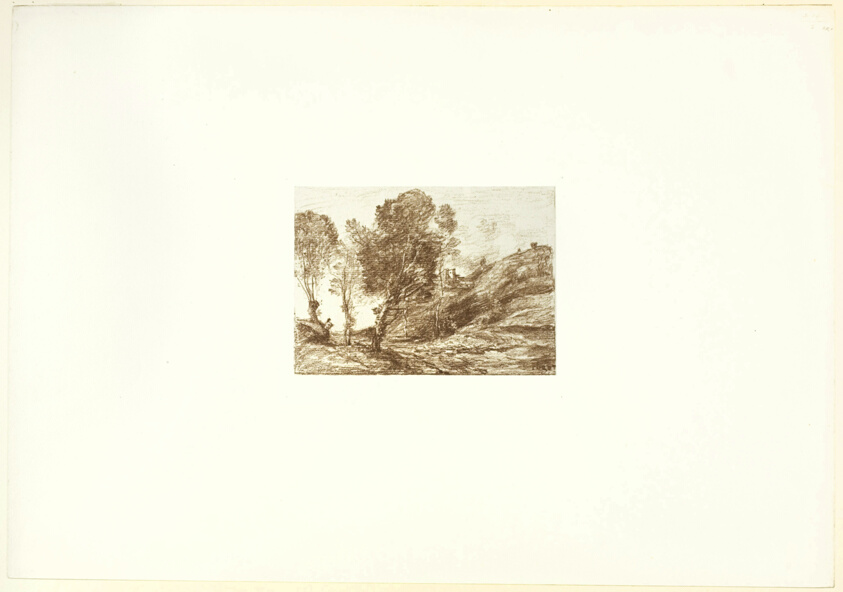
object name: Print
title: Remembrance of Italy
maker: Jean-Baptiste-Camille Corot; French, 1796-1875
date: 1871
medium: Transfer lithograph printed in brown on light gray China paper laid down on white wove paper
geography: France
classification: lithograph; print; prints and drawing